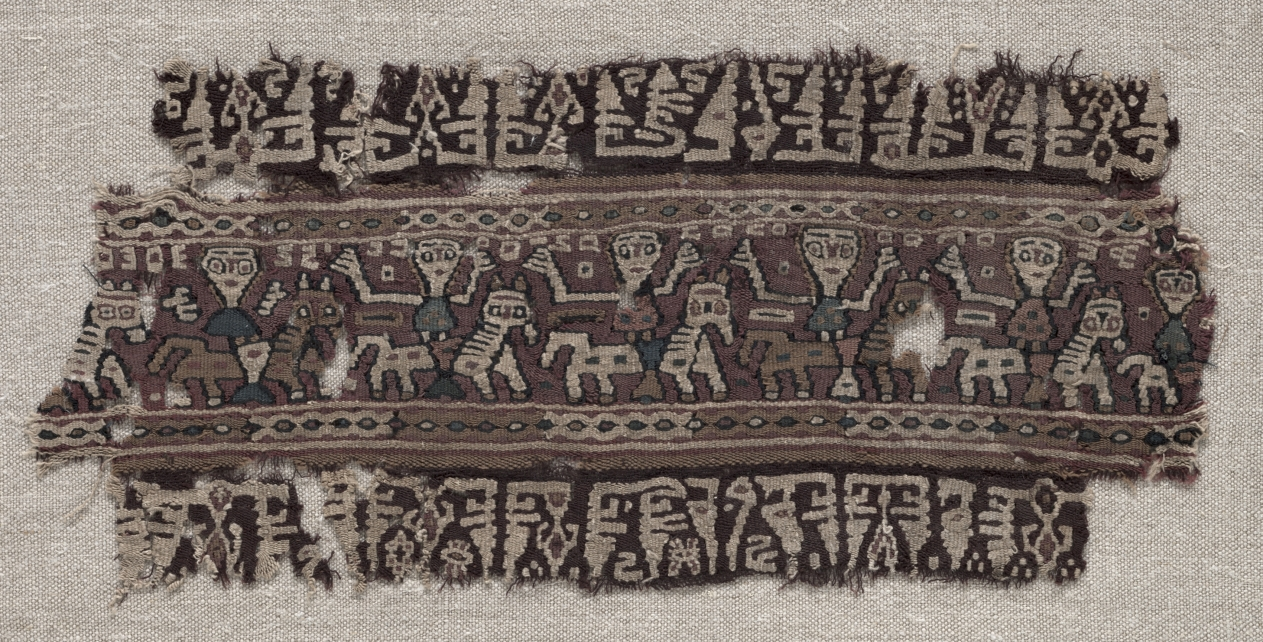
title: Fragment of an Ornamental Band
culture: Egypt, al Faiyûm, late Abbasid or early Tulunid period, 9th century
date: 800s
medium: tapestry (originally inwoven in tabby ground); wool and linen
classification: Textile